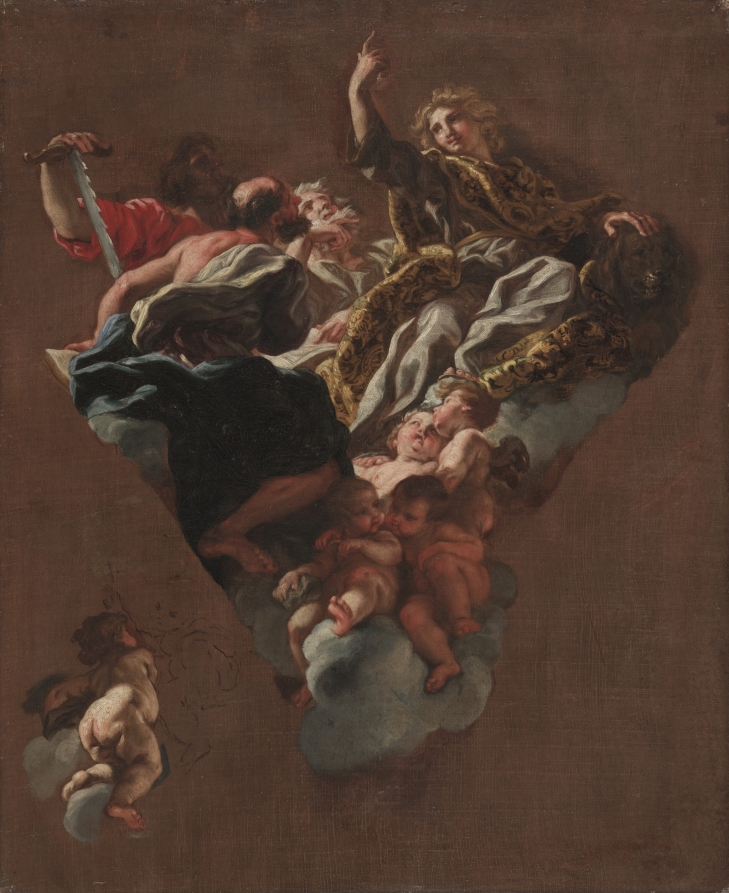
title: Sketch for "The Four Prophets of Israel" (for Il Gesù, Rome)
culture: Italy, 17th century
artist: Giovanni Battista Gaulli (Italian, 1639–1709)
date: c. 1675–1677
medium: oil on canvas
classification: Painting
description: This small painting represents the four prophets of Israel: Isaiah, Jeremiah, Ezekiel, and Daniel. It is one of seven oil sketches made in preparation for the decoration of the four pendentives in the Jesuit Church of the Gesù in Rome. The artist, one of the most prominent large-scale decorative painters in Rome, is known for his grand painting of the vault of the Gesù. Giovanni Batista Gaulli followed the Italian decorative tradition by preparing this sketch, called a bozzetto, to work out his ideas before the final fresco was painted. Fresco painting was the most desirable media for public and private locations, created by mixing dry pigment into wet plaster. They are an ideal permanent decoration; however, the process is tedious and thorough preparation is essential to ensure high quality. Oil sketches would aid the artist in creating a final composition and choosing their palette and would be particularly helpful for awkward spaces such as the pendentive, an inverted triangle. In this scene, Gaulli changed his initial composition for the final fresco, balancing the four prophets and young putti with the young Daniel as the most prominent figure motioning toward the dome.